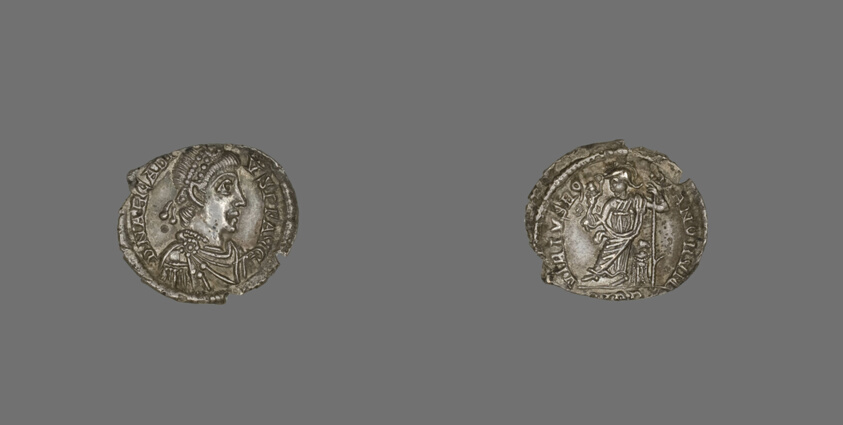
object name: Coin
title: Coin Portraying Emperor Arcadius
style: roman (ancient, style or period), ancient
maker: Roman, minted in Trier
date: 392-395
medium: Silver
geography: Trier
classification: coin; ancient art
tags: portrait